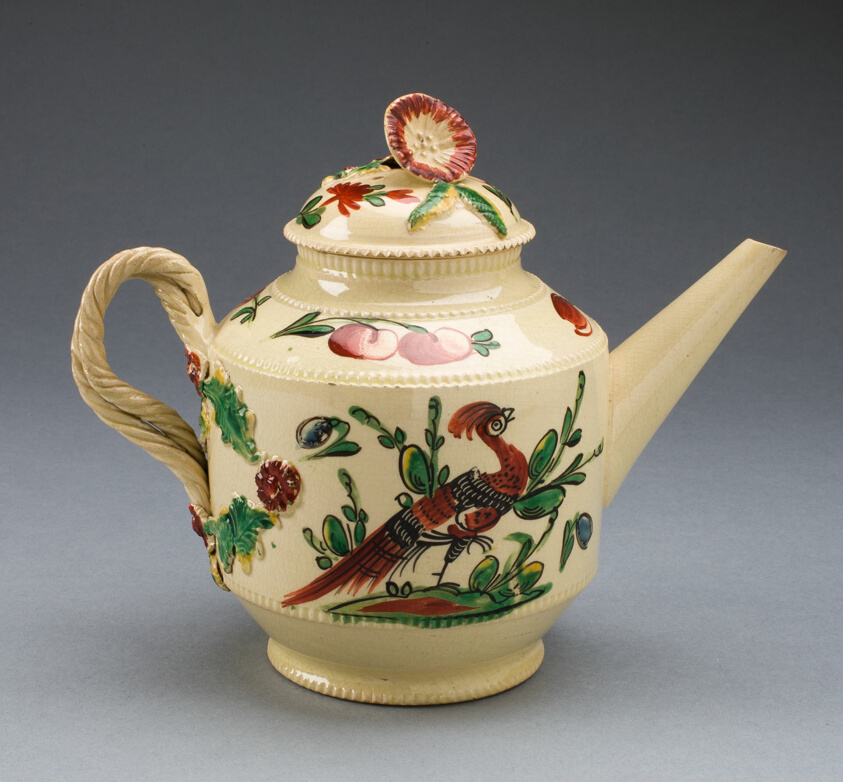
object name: Ceramics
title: Teapot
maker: Leeds, England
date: c. 1770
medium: Lead-glazed earthenware (creamware) and polychrome enamels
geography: Leeds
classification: teapot; earthenware; ceramics; creamware; lead-glazed earthenware; european decorative arts